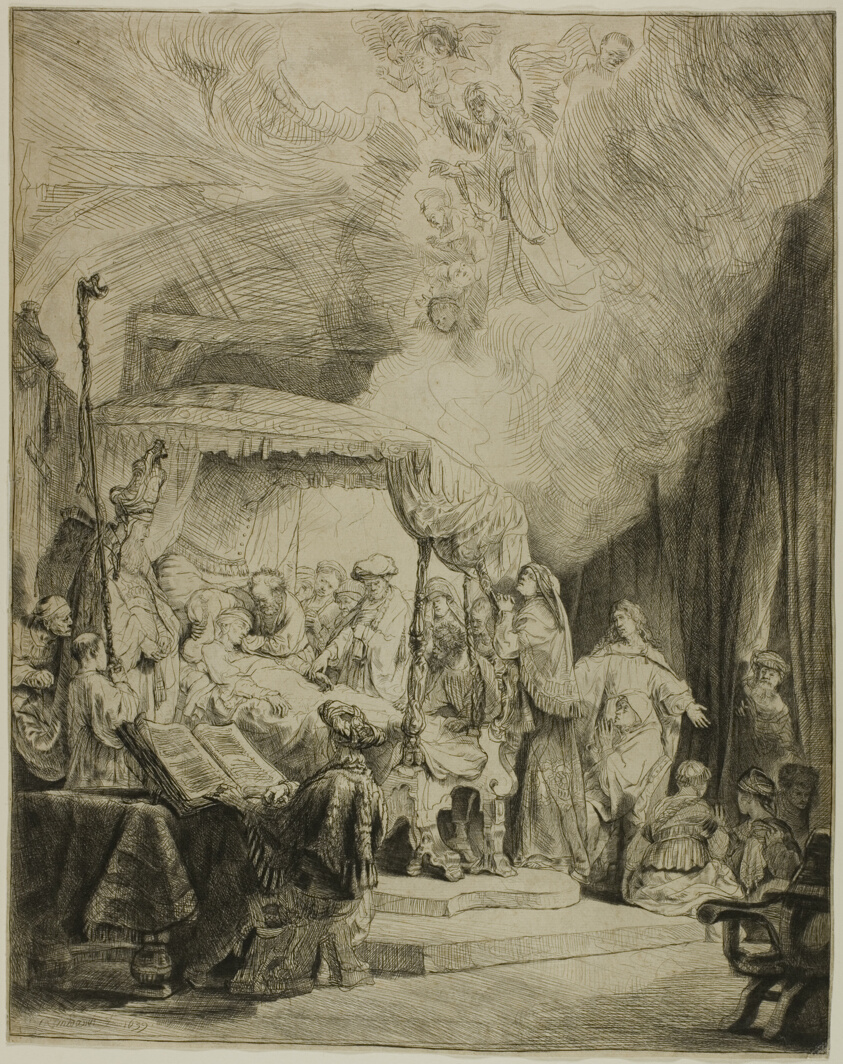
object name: Print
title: The Death of the Virgin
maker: Rembrandt van Rijn (Dutch, 1606-1669)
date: 1639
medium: Etching and drypoint on ivory laid paper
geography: Holland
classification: etching; print; prints and drawing; paper; drypoint